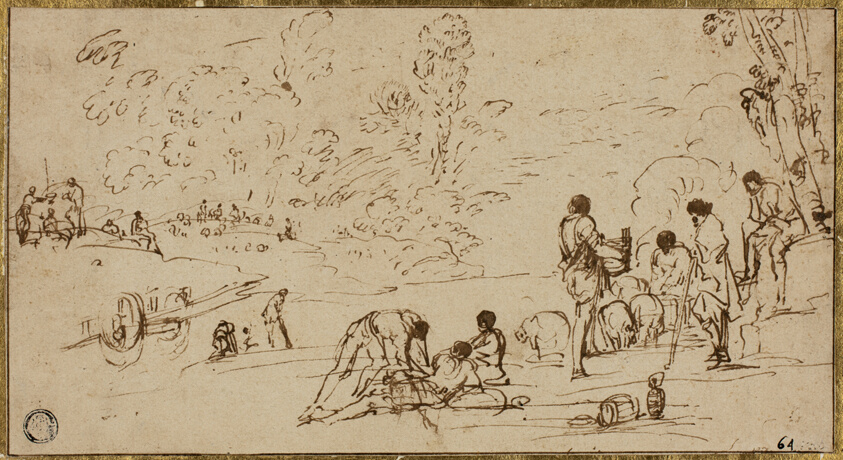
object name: Drawing and Watercolor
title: Group of Figures by a River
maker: Attributed to Agostino Tassi (Italian, c. 1580-1644); or Annibale Carracci (Italian, 1560-1609)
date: 1620s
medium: Pen and brown ink with brush and brown ink, on buff laid paper, laid down on ivory laid card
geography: Italy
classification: pen and ink drawings; drawings (visual works); prints and drawing